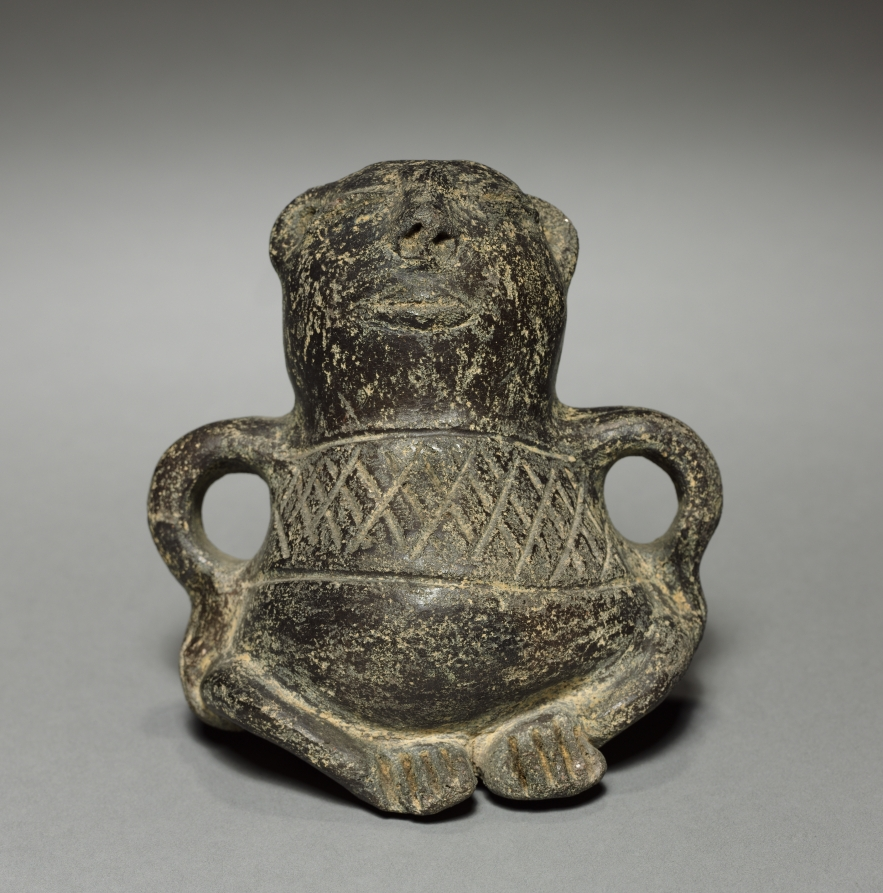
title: Seated Figure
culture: Colombia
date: before 1921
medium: pottery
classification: Ceramic